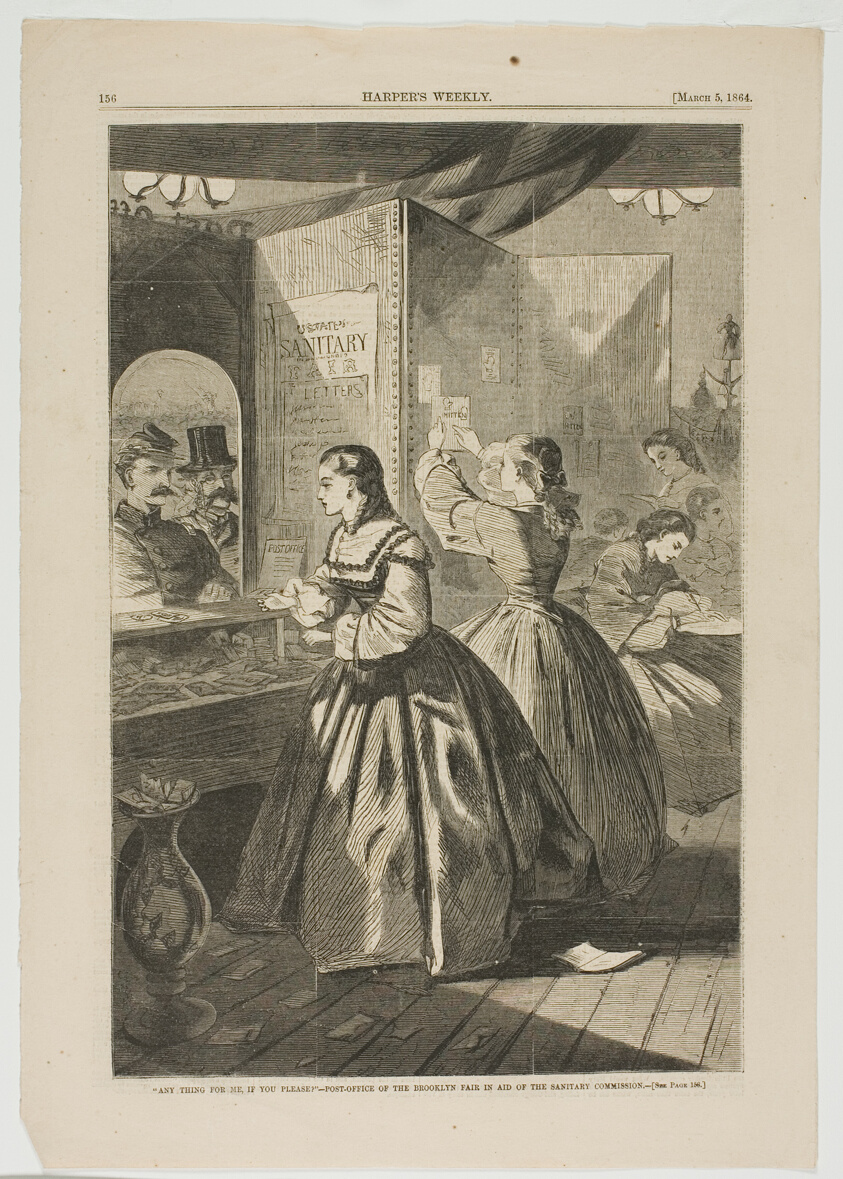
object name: Print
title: "Any Thing for Me, If You Please?"—Post-Office of the Brooklyn Fair in Aid of the Sanitary Commission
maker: Winslow Homer (American, 1836-1910); published by Harper's Weekly (American, 1857-1916)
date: published March 5, 1864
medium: Wood engraving on paper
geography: United States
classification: wood engraving; print; prints and drawing